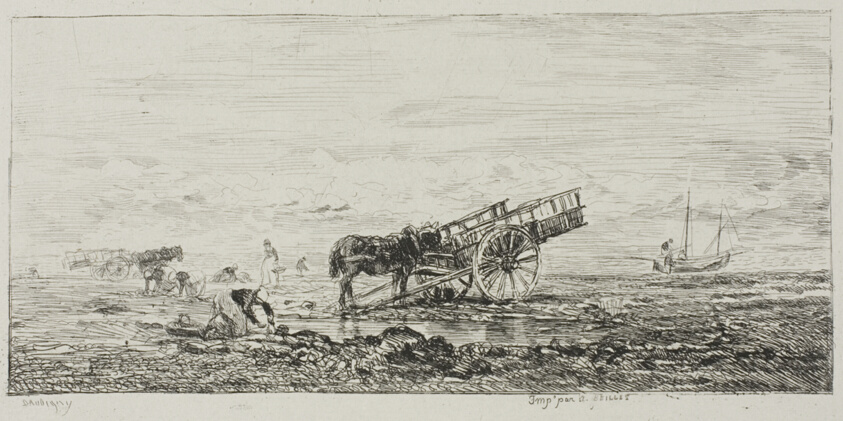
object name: Print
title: Beach at Villerville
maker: Charles François Daubigny (French, 1817-1878)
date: 1855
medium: Etching on light gray chine laid down on white wove paper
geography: France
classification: etching; print; prints and drawing